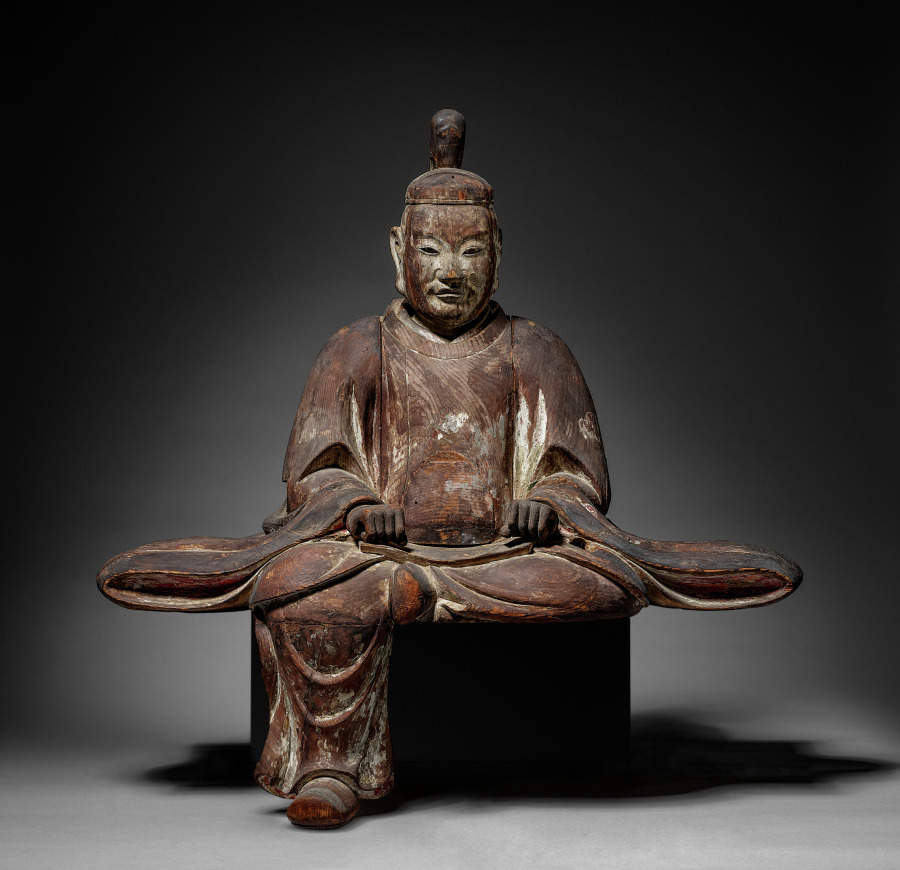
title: One of a Pair of Guardian Figures (Zuishin)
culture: Japan, Muromachi period (1392–1573) to Edo period (1615–1858)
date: c. 1560–1625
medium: Japanese cypress (hinoki) with traces of color; crystal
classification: Sculpture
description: Sculptors carved these two figures to look like members of the guard who protected the Japanese aristocracy in the 10th to 12th centuries. The pair belong in the roofed gate of a Shinto shrine. Their role was to embody the divine protectors of the deities, or kami, residing at the shrine. Their inset crystal eyes make them appear vigilant.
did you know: Some Japanese sculptors used to specialize in inset crystal eyes.